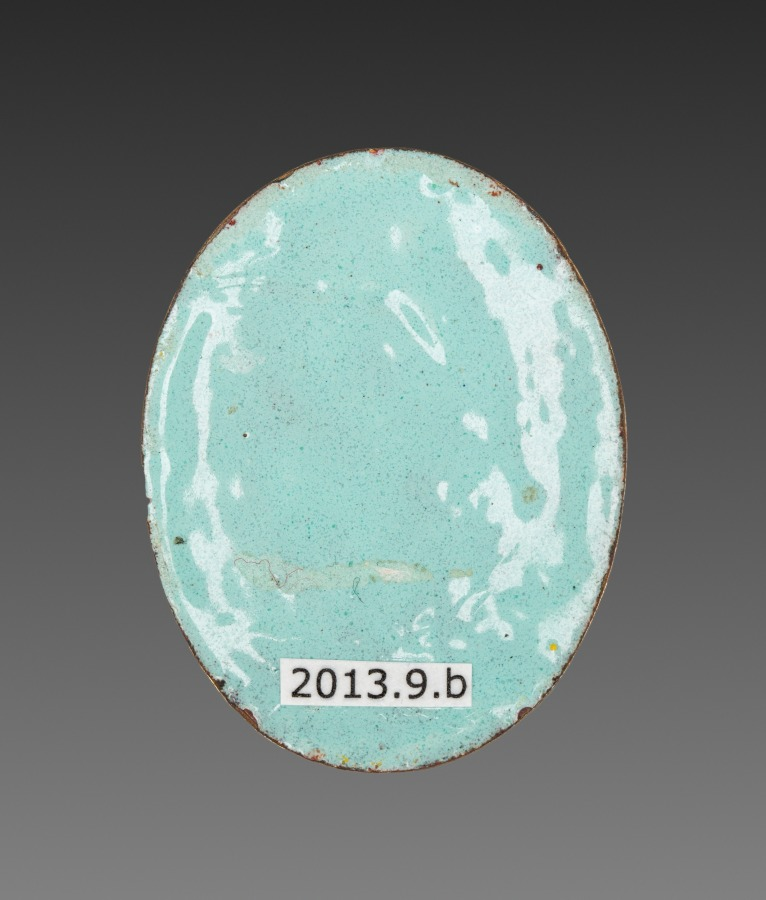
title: Locket Panel (2 of 4)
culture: France, 19th century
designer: Alexis Falize (French, 1811–1898)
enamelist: Antoine Tard (French, active 1860–1889)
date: 1800s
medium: gold and cloisonné enamel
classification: Jewelry